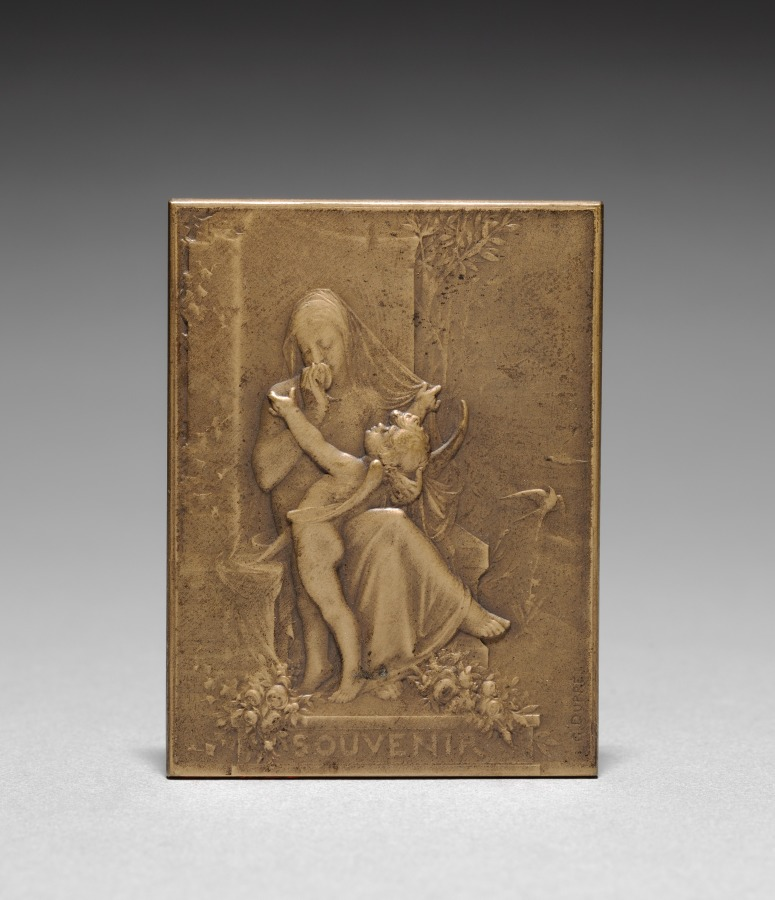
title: Medallion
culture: France, 19th-20th century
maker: Georges Dupré (French, 1869–1909)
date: c.1900–1921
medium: bronze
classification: Metalwork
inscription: "Souvenir"; signed: "G. Dupré."